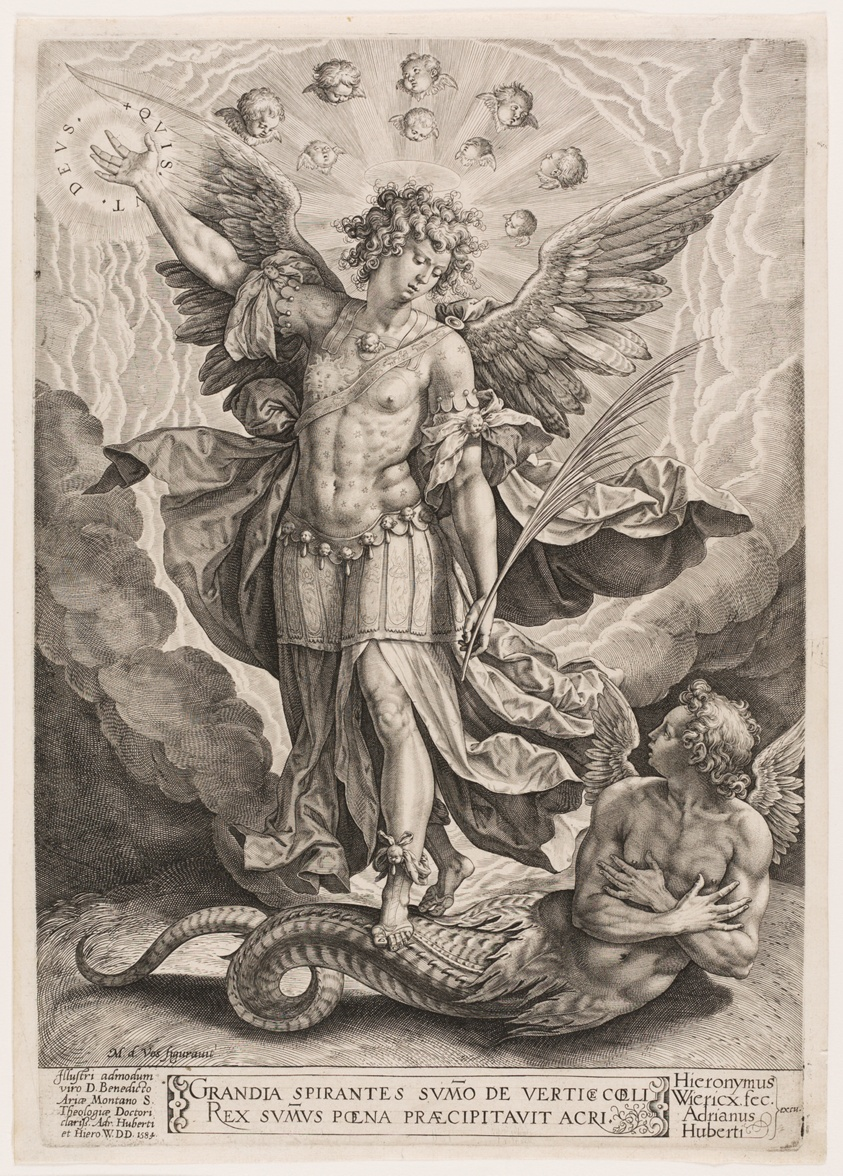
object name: Print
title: St Michael Triumphing Over the Dragon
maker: Jerome Wierix (Flemish, 1553-1619); after Martin de Vos (Flemish, 1532-1603)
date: 1584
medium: Engraving in black on ivory laid paper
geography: Flanders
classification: engraving; print; prints and drawing